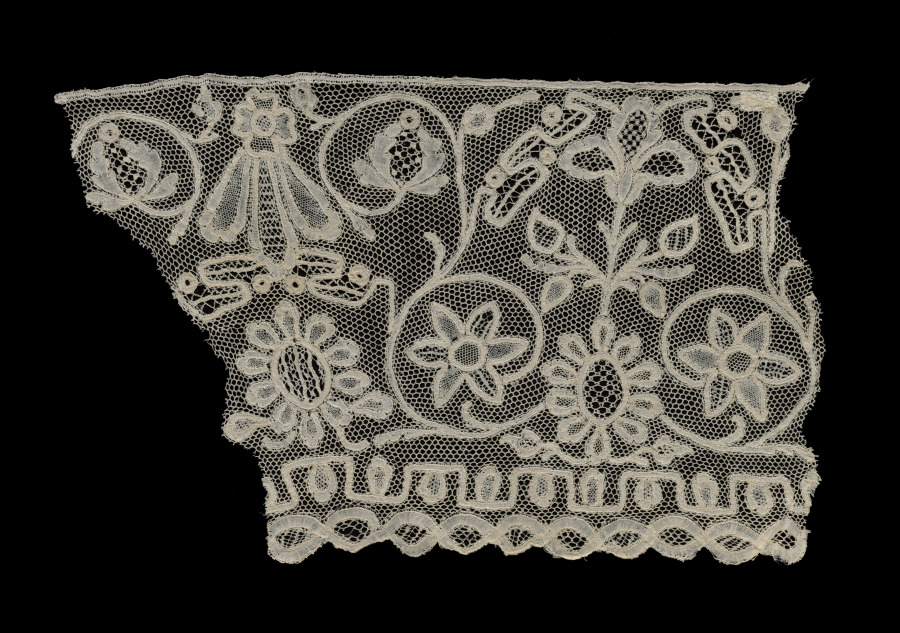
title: Fragment of Lace Flounce made into a Cuff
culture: Flanders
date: 1600s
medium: Linen: bobbin lace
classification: Lace